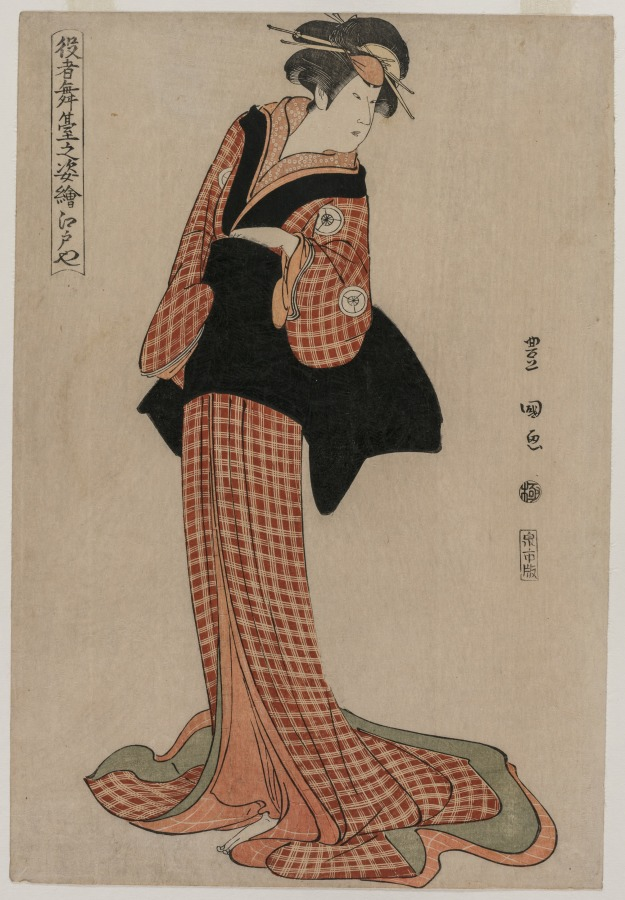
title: Iwai Kiyotaro (Edoya) as Okaru (from the series Pictures of Actors Onstage)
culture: Japan, Edo period (1615–1868)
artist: Utagawa Toyokuni (Japanese, 1769–1825)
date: 1794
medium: color woodblock print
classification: Print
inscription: Signature: Toyokuni ga Publisher: Izumiya Ichibei (Senichi han) Censorship Seal: kiwame